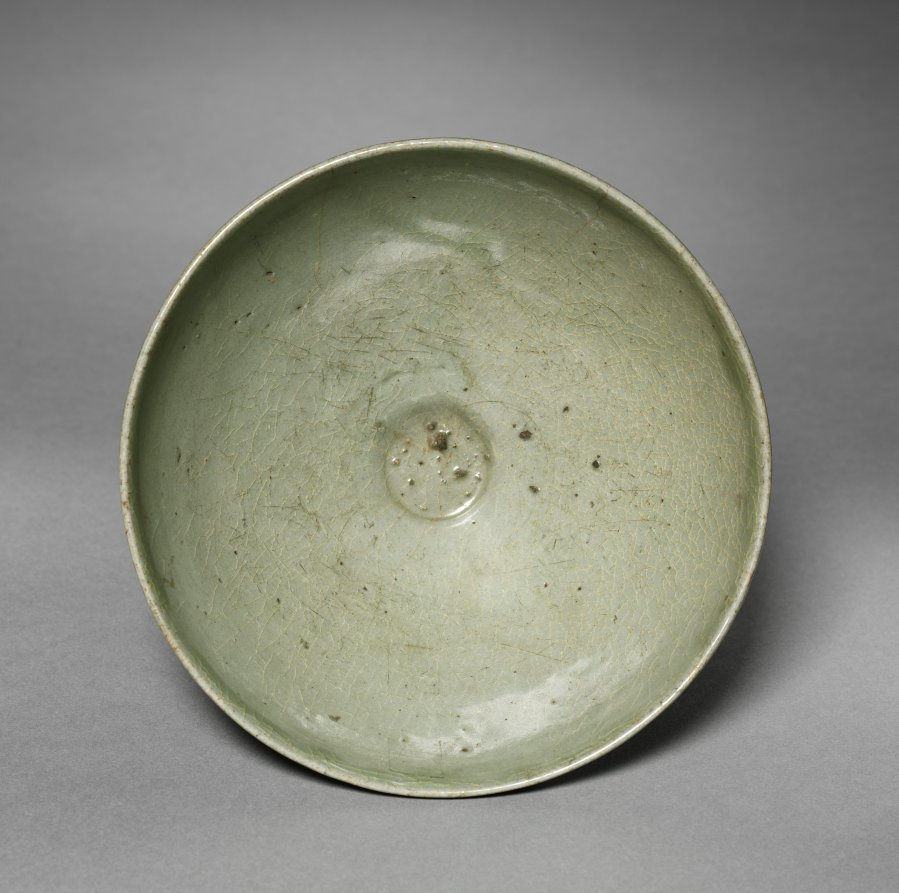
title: Bowl with Lotus Petal Design in Relief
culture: Korea, Goryeo dynasty (918–1392)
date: 1200s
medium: porcelain celadon ware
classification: Ceramic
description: As early as the 600s, the practice of drinking tea and wine became an important part of elite leisure culture in Korea. A wide bowl like this example was especially suitable for drinking powdered tea shaved from a compressed tea cake, the most commonly enjoyed type during the Goryeo period. The outer wall of this tea bowl is decorated with the image of lotus flower, a symbol of purity.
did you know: The exterior decor that resembles an opening lotus flower was shaped in a carved wooden mold. Then the potter touched it up with incised details.